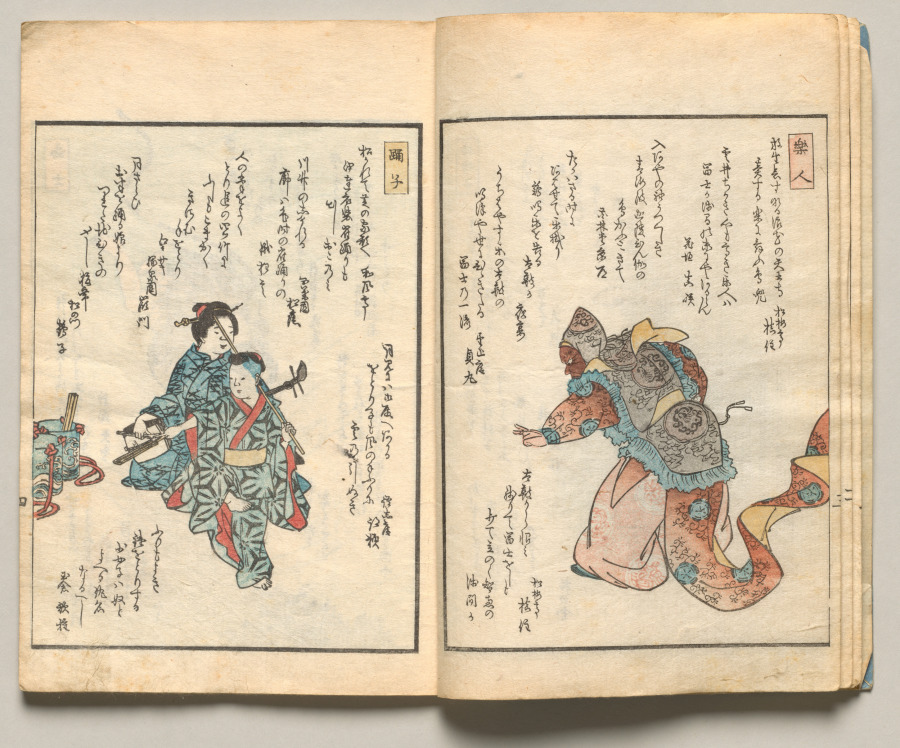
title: Spread Four from Volume Three of People of Japan in Light Verse (Kyōka)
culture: Japan, Edo period (1615–1868)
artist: Utagawa Hiroshige (Japanese, 1797–1858)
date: 1857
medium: Woodblock-printed book; ink and color on paper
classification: Bound Volume